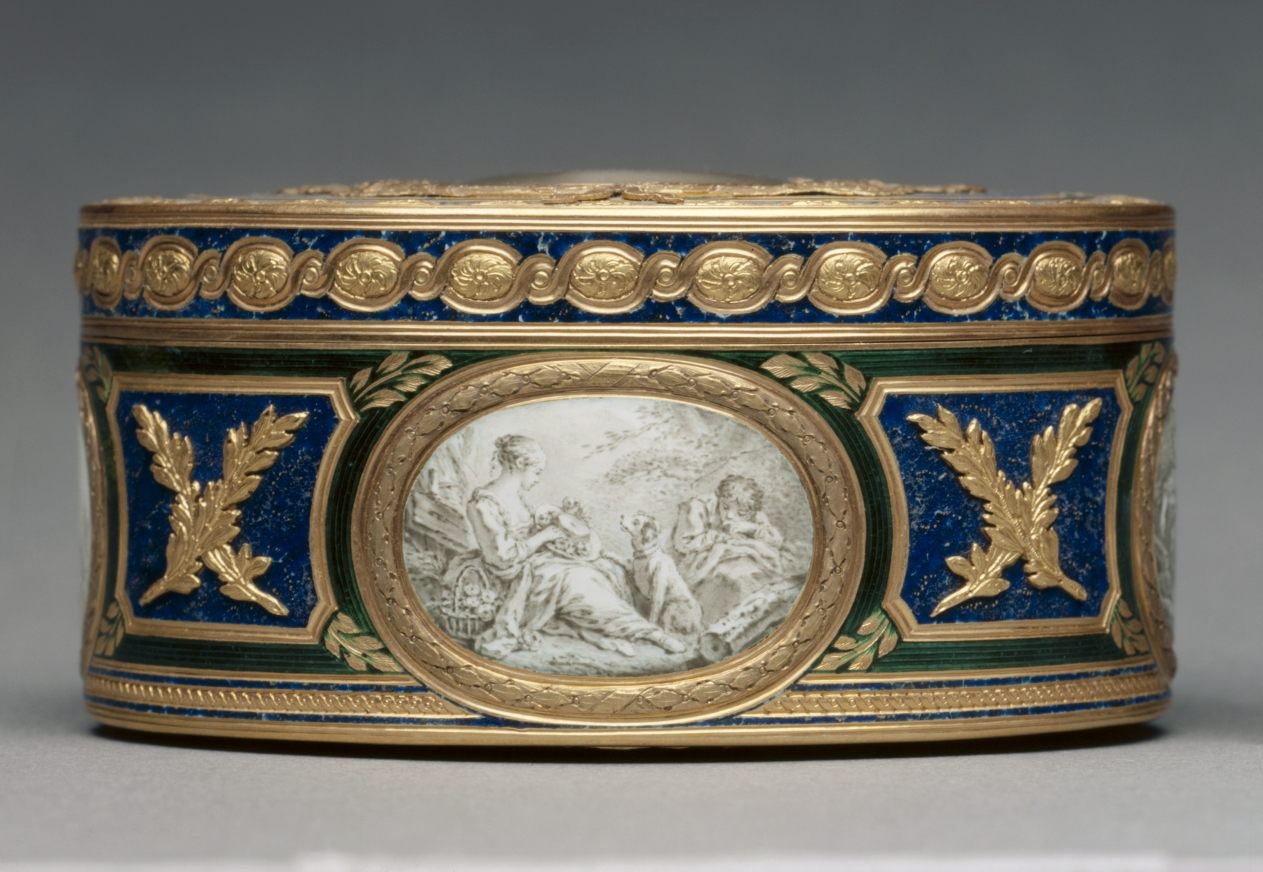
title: Snuff Box (Tabatière) with Portrait of Marie Antoinette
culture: France, 18th century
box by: Pierre-François-Mathis de Beaulieu (French)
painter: François Dumont (French, 1751–1831)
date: 1768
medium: watercolor on ivory in a gold and enamel box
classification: Enamel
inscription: [Maker's mark of Pierre-François-Mathis de Beaulieu, master goldsmith in 1768, inside cover]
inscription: [Charge mark of Jean-Jacques Prévot, 1762-1768, inside cover]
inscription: [Warden's mark of Paris, 1768-1769, inside cover]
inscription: [Discharge mark of Julien Alaterre, Paris, 1768-1774, on neck at right]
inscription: [Inside box, the letter]: "F"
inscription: [On bezel at left, engraved number]: "627"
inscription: [On front of bezel, engraved signature]: "Ve Georges Beaulieu à Paris"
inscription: [On right of miniature portrait, the letter]: "D"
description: This box was created through the collaboration of two skilled and well-known artisans of the period, master goldsmith Pierre-François-Mathis de Beaulieu and celebrated miniature painter François Dumont. The portrait of Marie Antoinette on the box's lid is painted in Dumont’s own style while those on the sides and bottom of the box take inspiration from the work of painter François Boucher, known for his pastoral scenes in the Rococo style.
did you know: Marie Antoinette, queen consort of French King Louis XVI and great patron of the decorative arts, was executed in 1793 at the end of the French Revolution.